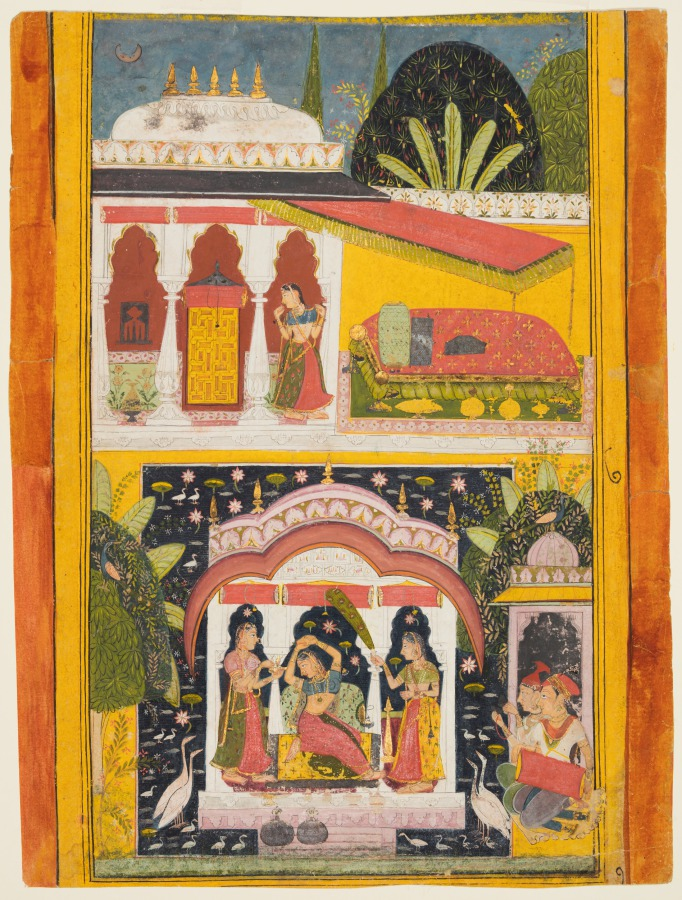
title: A Royal Woman in a Pavilion: Desavarari Ragini of Dipak, from a Ragamala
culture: Northwestern India, Rajasthan, Rajput Kingdom of Mewar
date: c. 1695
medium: gum tempera, ink, silver, and gold on paper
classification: Painting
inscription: dīpaka dī raganī desabarārī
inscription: Dipak ki R Desavarari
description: A sumptuous palace setting depicts the women’s quarters. In the upper register a woman approaches a bed made under a canopy on a terrace overlooking a lotus pool in the middle of which is a pleasure pavilion. An attendant holds a peacock tail feather whisk to indicate the royal status of the woman in the center; two musicians play drum and cymbals in the lower right.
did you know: “Dipak” means lamp; one attendant holds a lamp; another is on a golden stand.